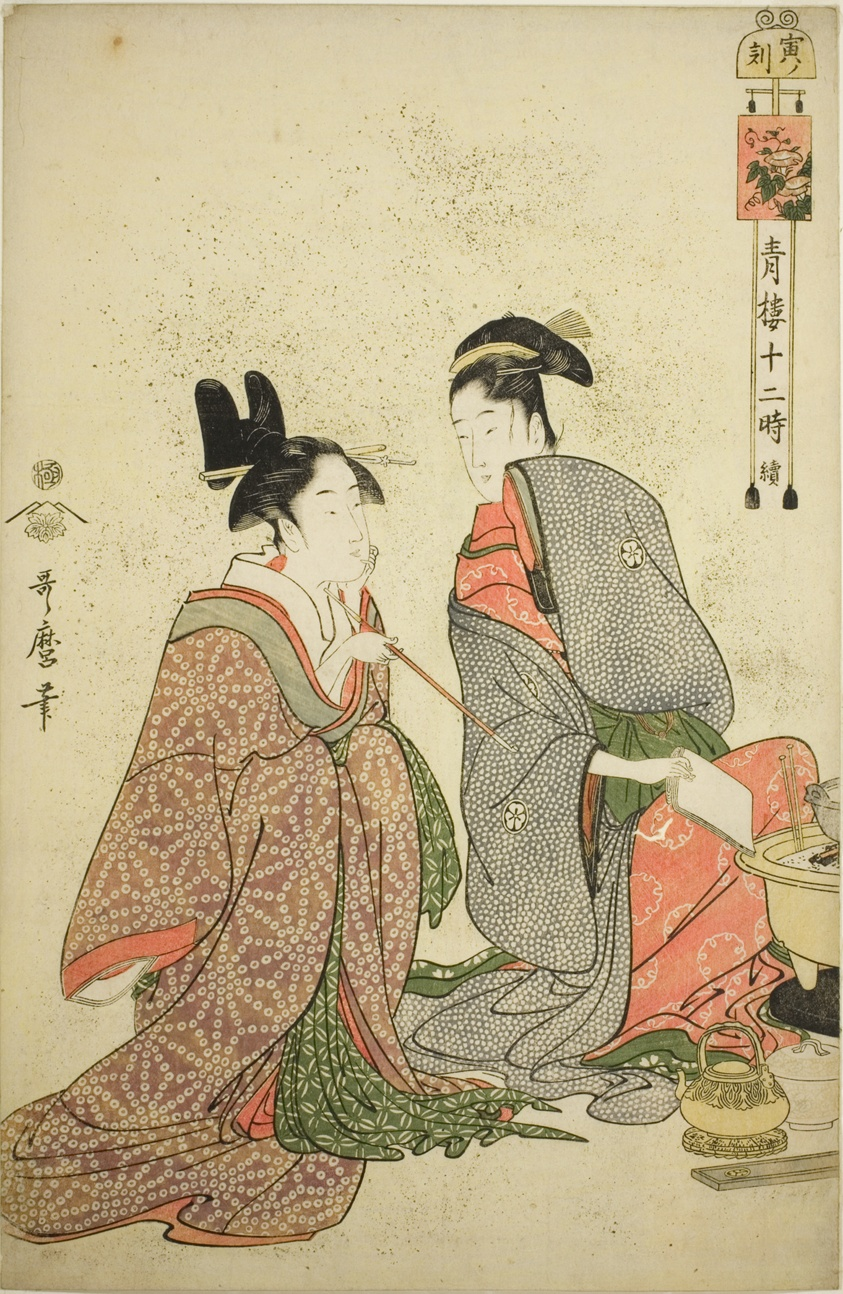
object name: Print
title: Hour of the Tiger (Tora no koku), from the series "Twelve Hours in Yoshiwara (Seiro juni toki tsuzuki)"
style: Japanese (culture or style)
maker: Kitagawa Utamaro 喜多川 歌麿; Japanese, 1753 (?)-1806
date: c. 1794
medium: Color woodblock print; oban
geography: Japan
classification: woodblock print; print; asian art